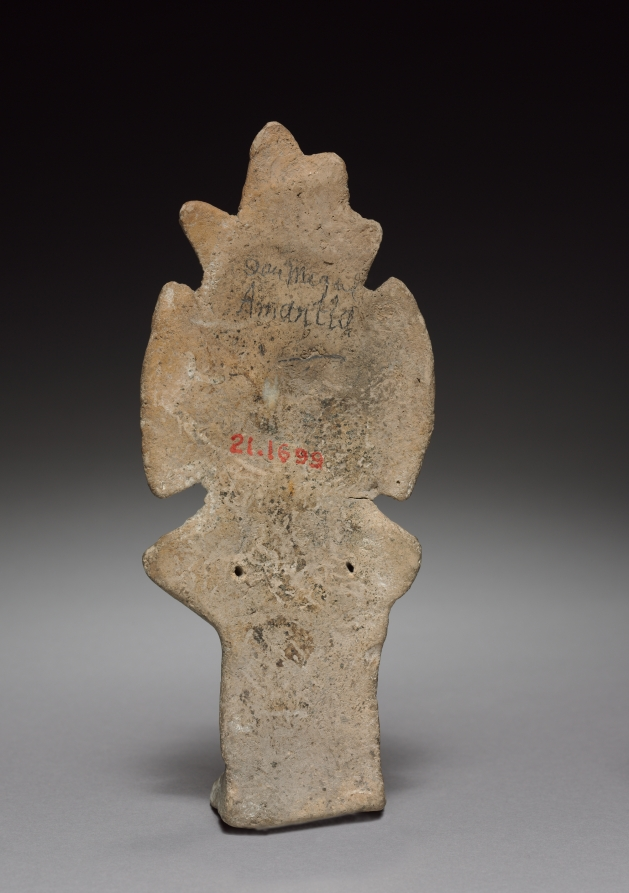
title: Figurine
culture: Mexico, Aztec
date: 1325–1521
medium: pottery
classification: Ceramic